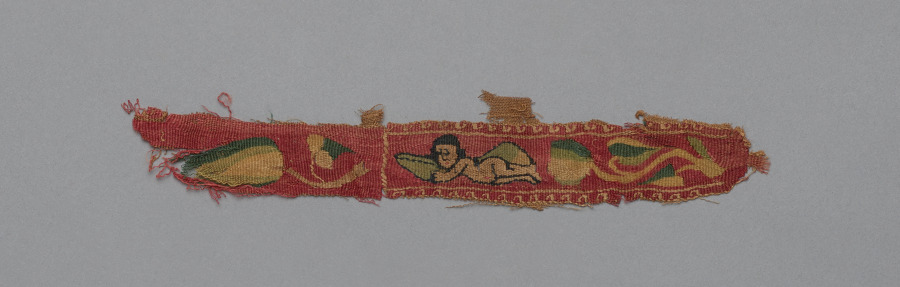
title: Fragment from a Tunic: Clavi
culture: Egypt, Umayyad period (661–750)?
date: 600s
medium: tabby weave, inwoven tapestry ornament; wool and linen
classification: Textile